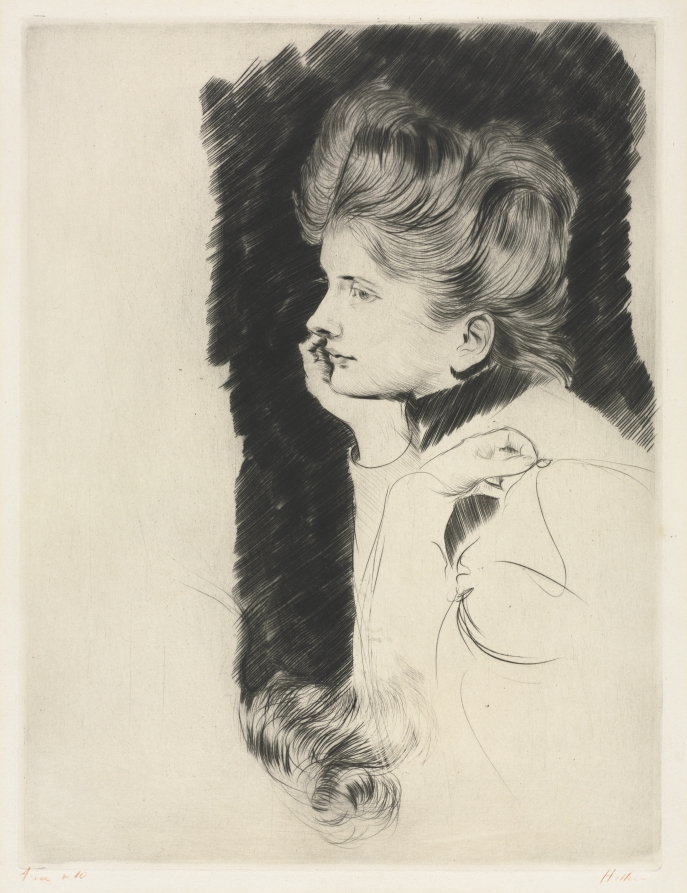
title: Head of a Woman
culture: France, 19th-20th century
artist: Paul César Helleu (French, 1859–1927)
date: c. 1880–1920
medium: drypoint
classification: Print